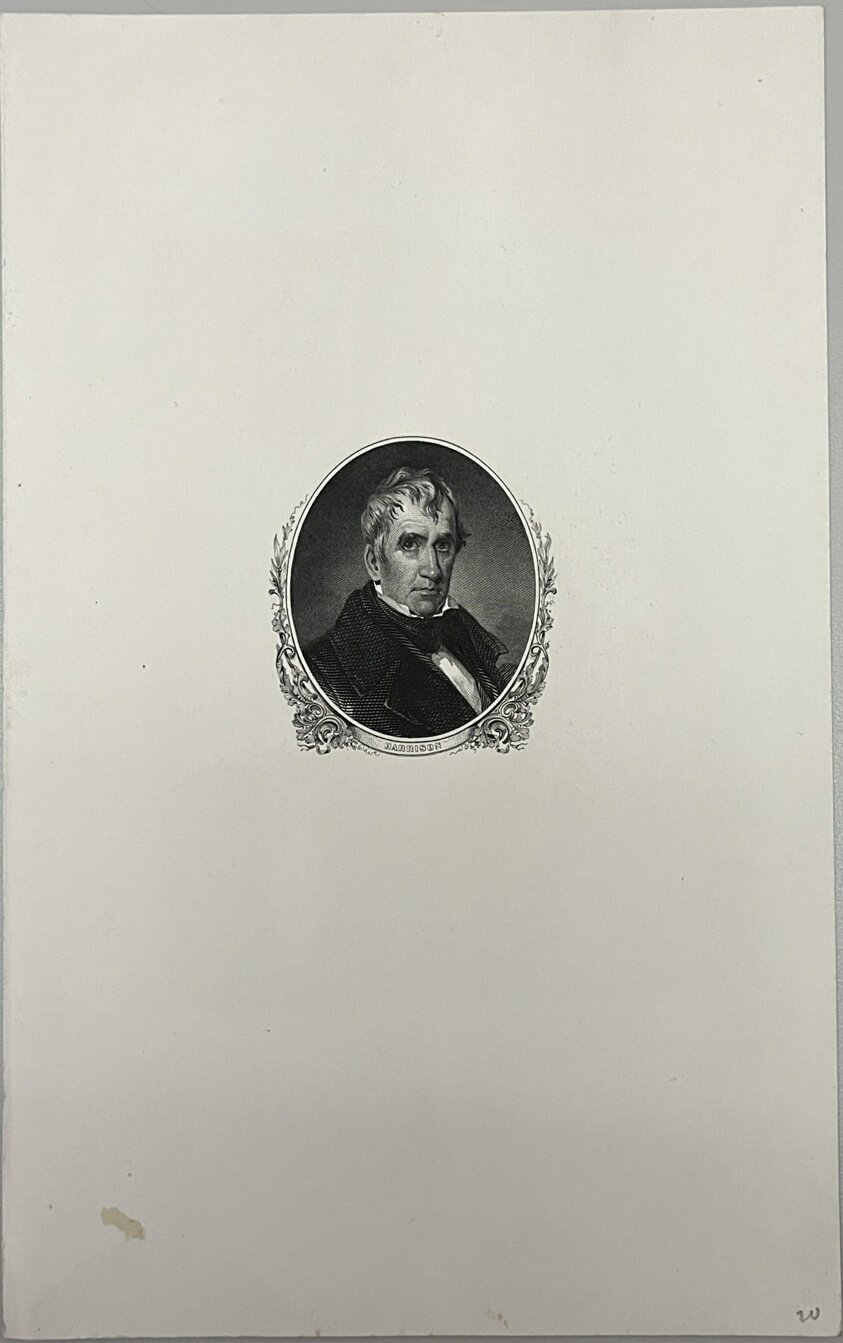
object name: Print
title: Harrison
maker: Artist Unknown (Likely American, 19th century)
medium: Etching on paper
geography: United States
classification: reproduction; print; prints and drawing